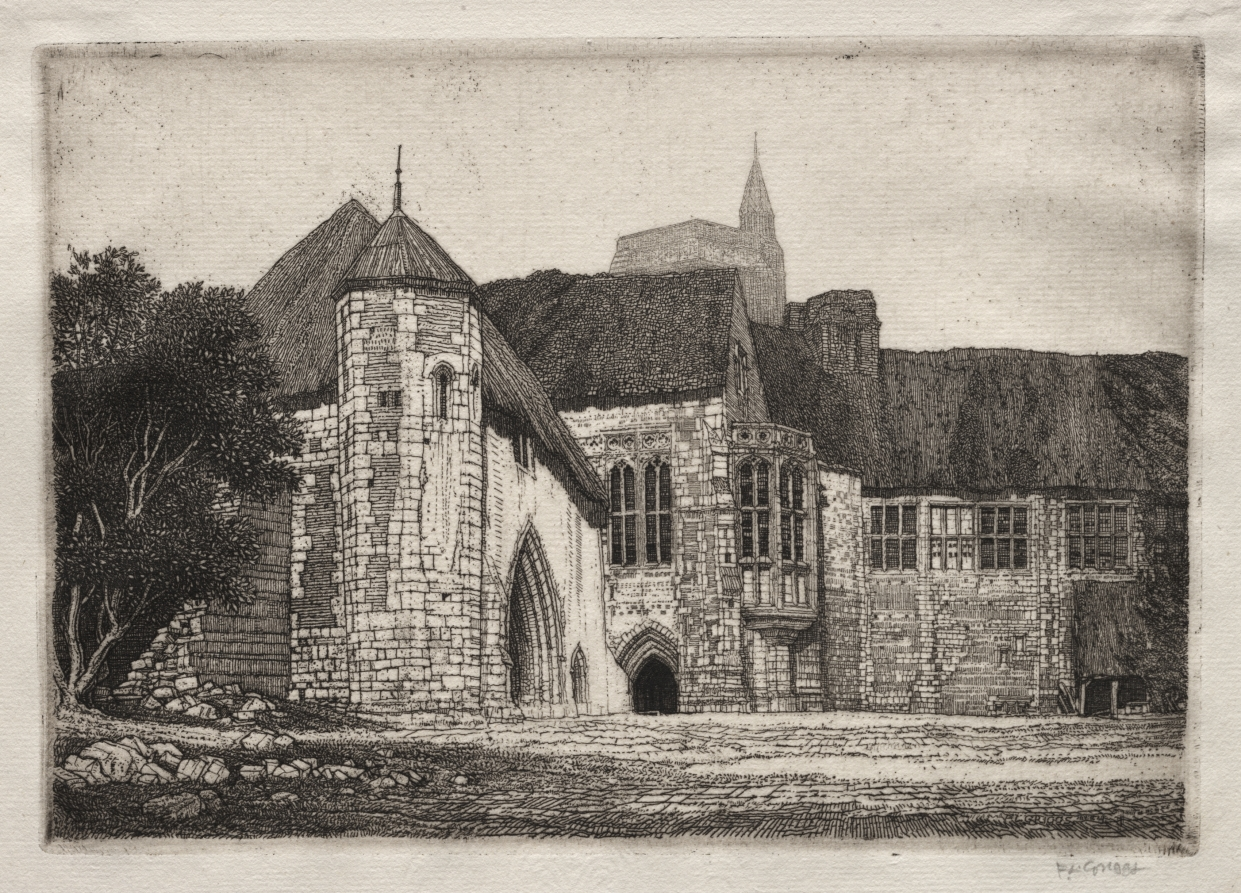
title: Palace Farm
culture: England, 20th century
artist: Frederick Landseer Maur Griggs (British, 1876–1938)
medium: etching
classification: Print